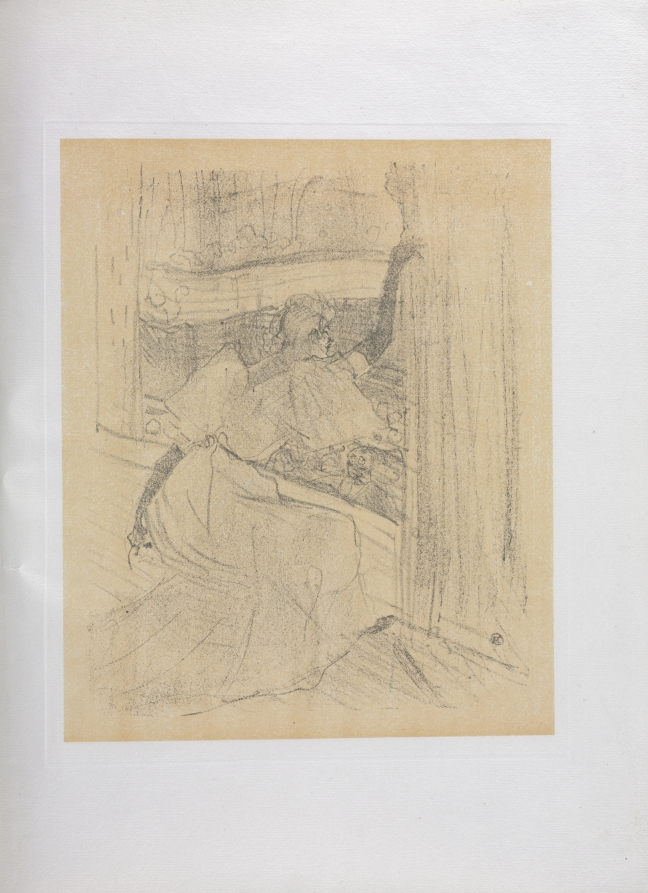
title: Yvette Guilbert-English Series: Saluant le public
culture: France, 19th century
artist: Henri de Toulouse-Lautrec (French, 1864–1901)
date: 1898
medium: lithograph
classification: Bound Volume